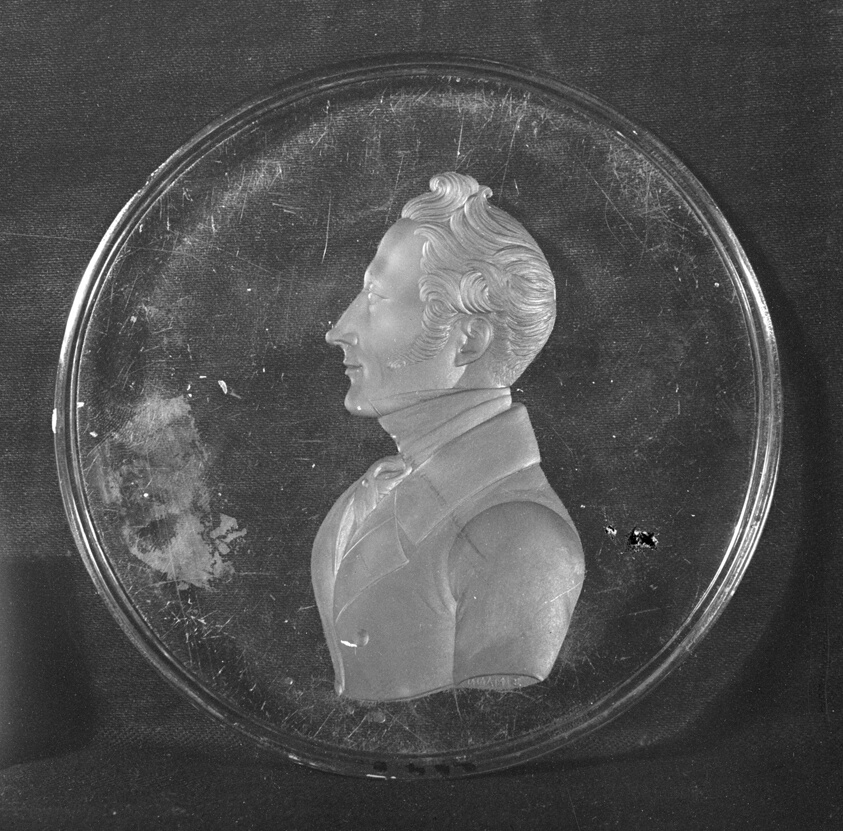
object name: Glass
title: Medallion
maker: Dominik Biemann (Bohemian, 1800-1857)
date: c. 1830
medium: Glass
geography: Bohemia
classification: glass; european decorative arts